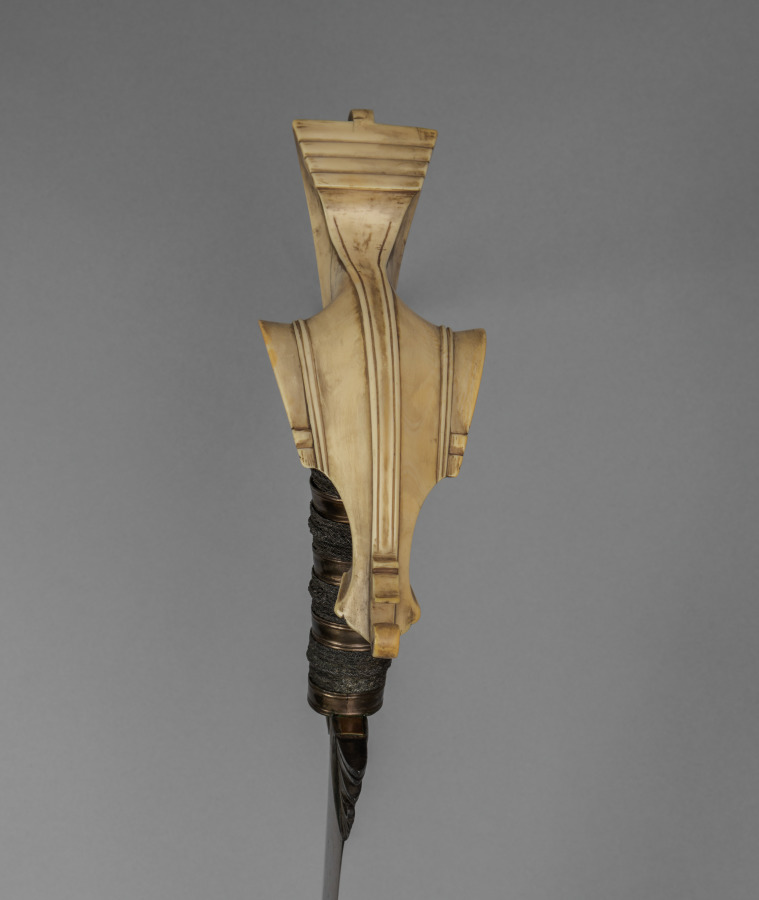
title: Sword (Kalis or Sundang)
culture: Philippines, Mindanao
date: before 1916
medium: Blade: metal; grip: brass ferrule and silver wire; pommel: ivory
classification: Arms and Armor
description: This sword features a long kalis blade with a straight profile and deep fuller running nearly the entire length. The hilt terminates in an enormous ivory pommel, a prestige marker associated with high-ranking ownership in the Sulu and Lake Lanao regions. The commanding blade, functional and symbolic clamps, silver-braided grip, and pommel identify this as an exceptional example of elite Moro weaponry used among the Tausug or Maranao groups in the southern Philippines.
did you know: The asang-asang (fish gill) clamps at the blade’s base stabilize it while referencing the purifying quality attributed to fish gills.